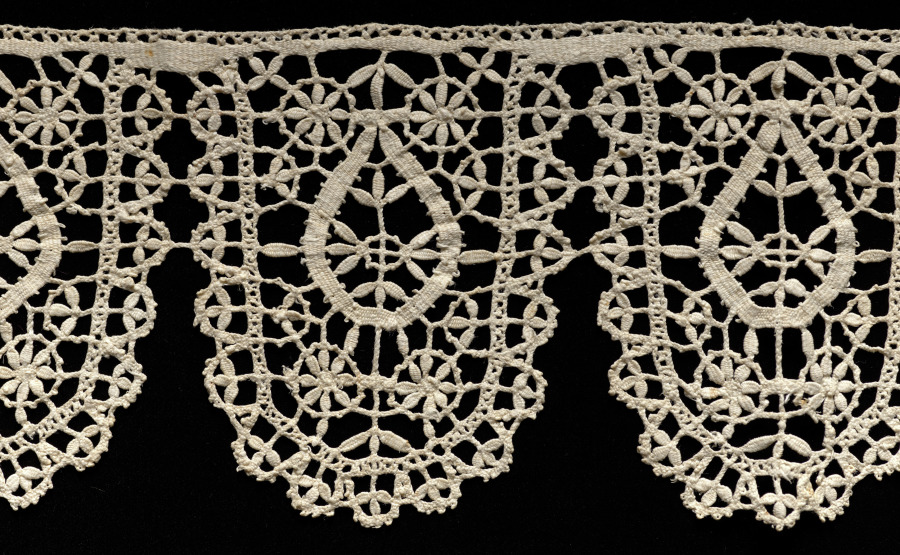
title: Lace Edging of Round Points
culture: Italy, Genoa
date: 1600s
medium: Bobbin lace (needle lace, rose lace design)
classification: Lace